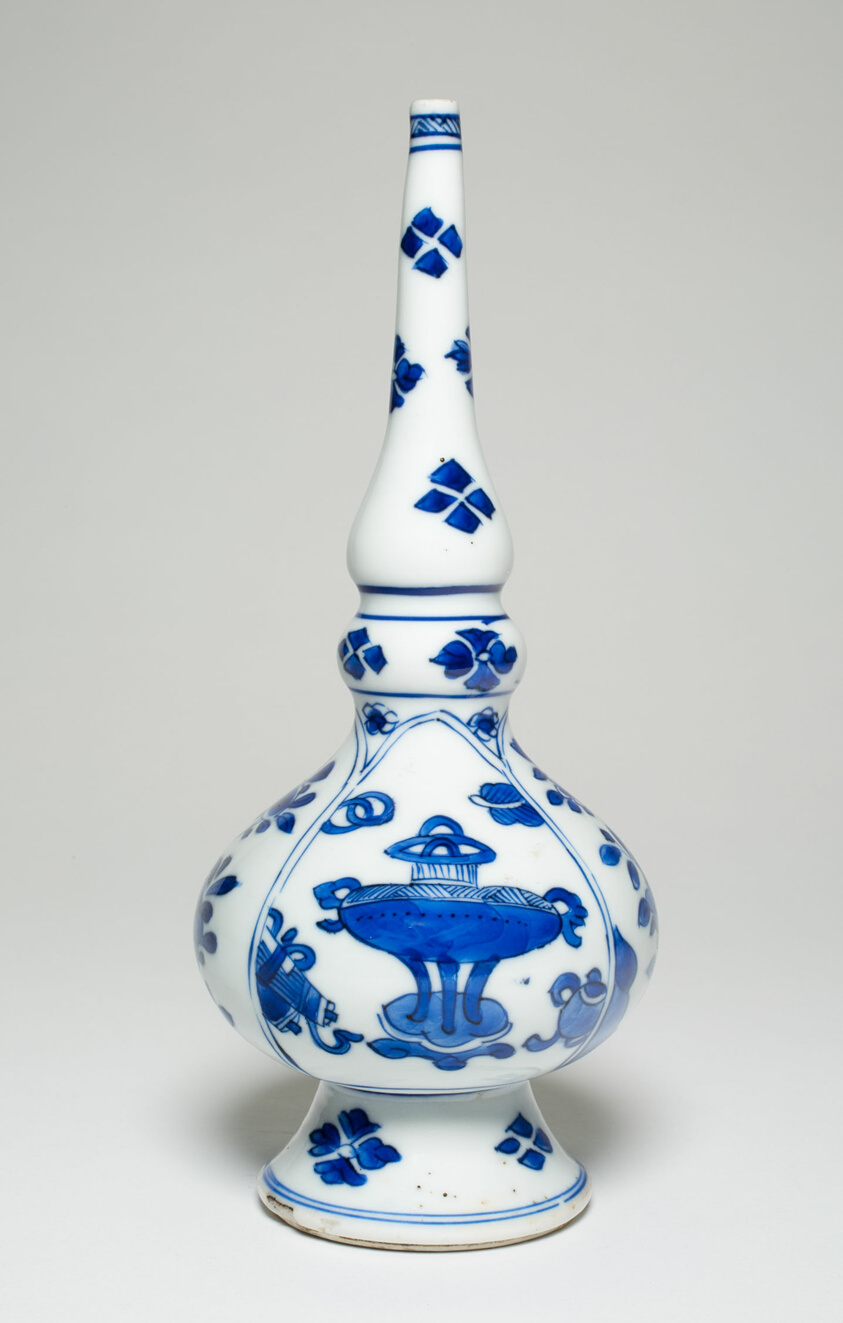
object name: Vessel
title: Gourd-Shaped Rosewater Sprinkler with Buddhist Utensils, Plum, and Peony Flowers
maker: China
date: Qing dynasty (1644–1911), Kangxi period (1662–1722)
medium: Porcelain painted in underglaze blue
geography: China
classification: porcelain; asian art; ceramics